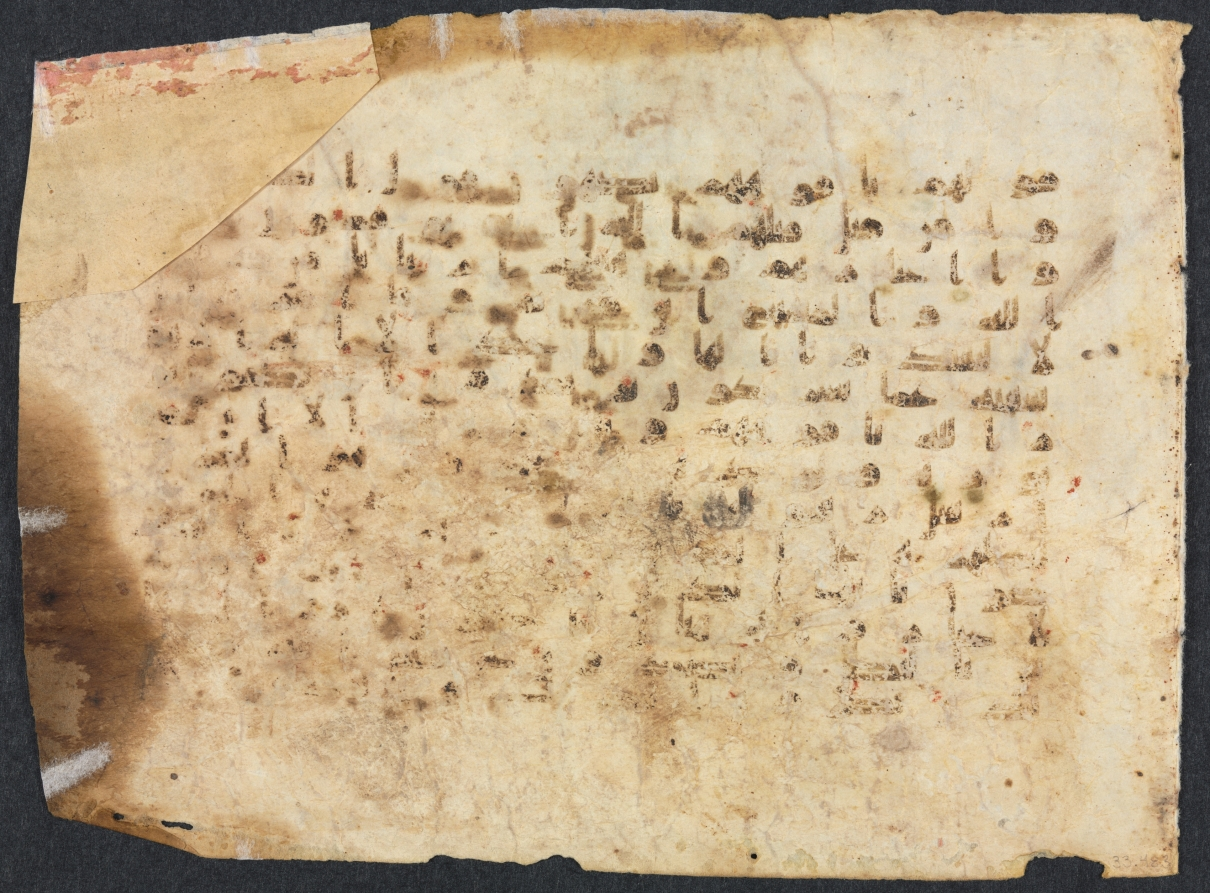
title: Qur'an Manuscript Folio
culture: Egypt?, Abbasid Period, 9th century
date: 800s-900s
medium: ink, gold, and color on parchment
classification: Calligraphy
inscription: Sura Al-Tawba 9: part 33 - part 37. Kufi Script (fourteen lines to a page)